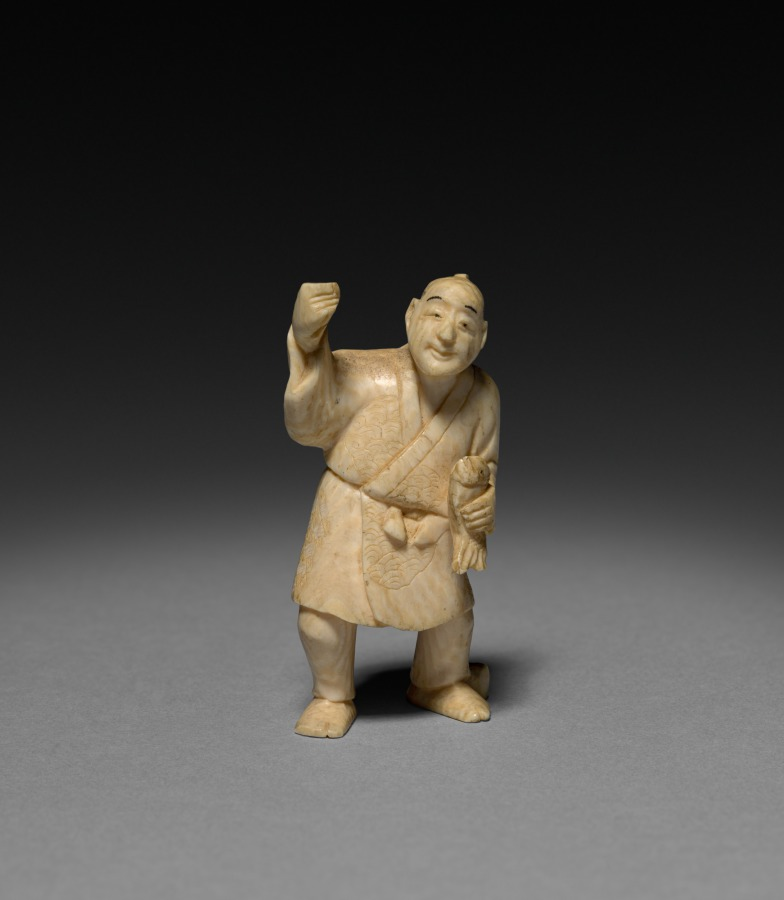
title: Man with Fish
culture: Japan, Meiji period (1868–1912)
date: early 1900s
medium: ivory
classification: Ivory